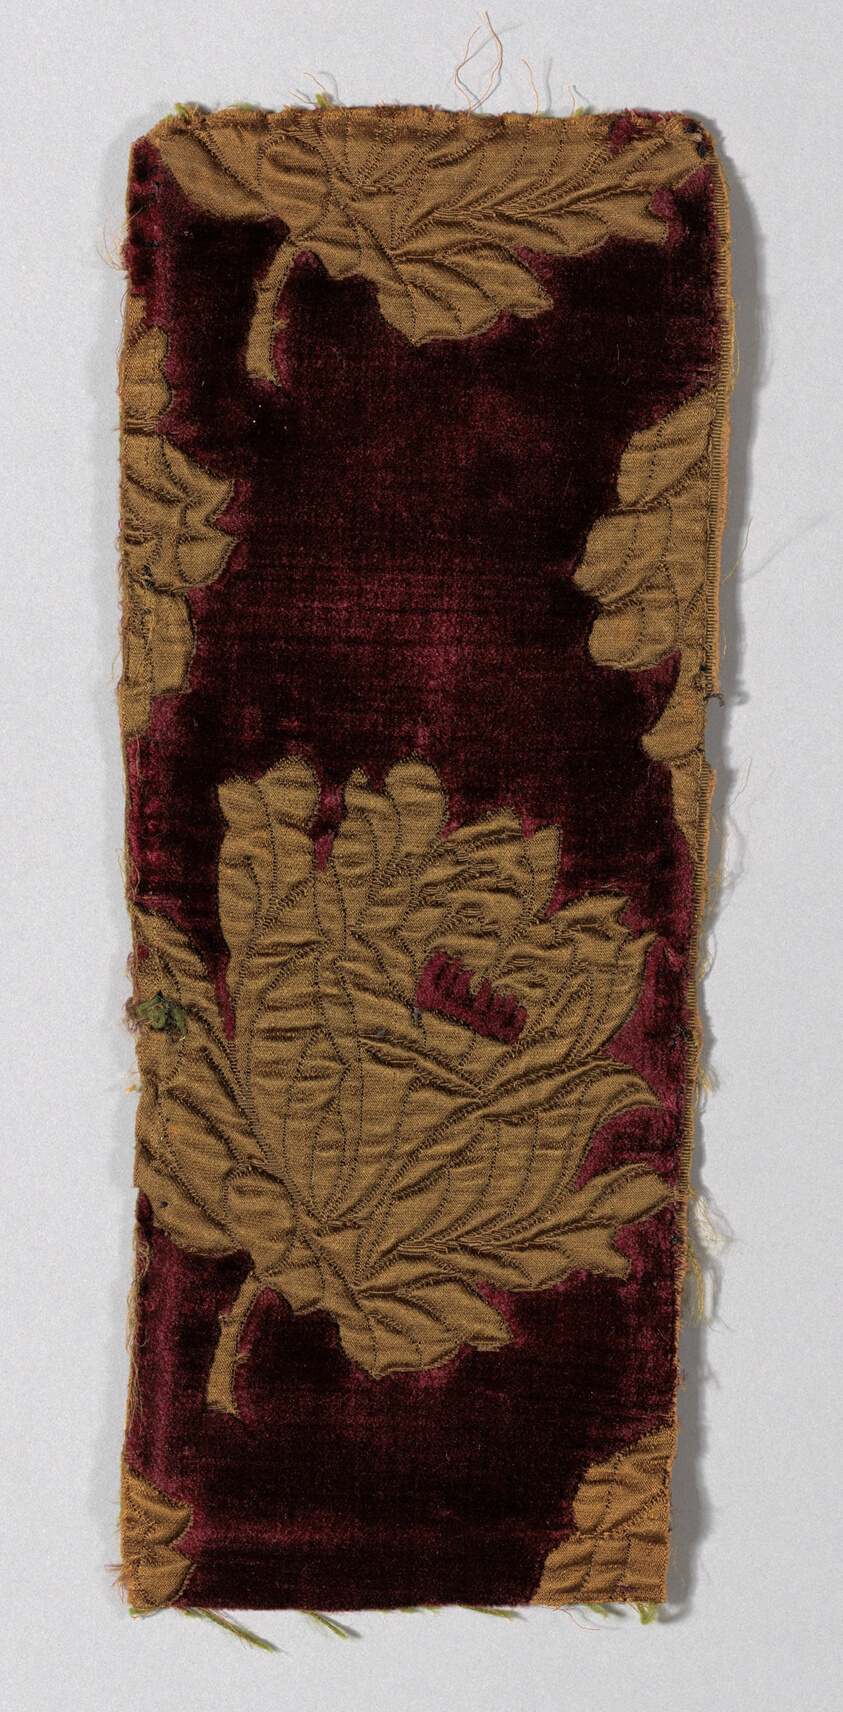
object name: Textile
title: Matelasse (Pieces from dress 1923.1639a)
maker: France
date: 1880/90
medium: Garnet velvet with moss green satin allover design of single large roses. Velvet, satin and wool. Matelasse is Jacquard figured fabric of heavy compound weave having raised pattern as if quilted or wadded. It was made of all materials or combinations of materials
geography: France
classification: textile; weaving; costume - weaving; weaving - velvet; costume